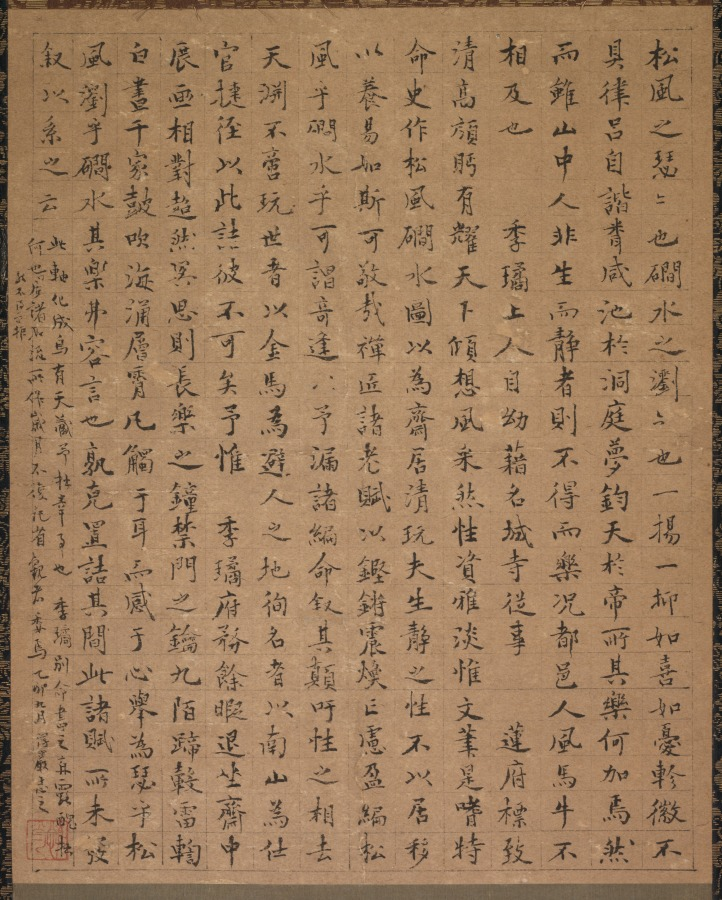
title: Landscape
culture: Japan, possibly Edo period (1615-1868)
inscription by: copy after Ishō Tokugan (Japanese, c. 1359–1437)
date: early 1600s to mid-1800s?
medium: hanging scroll; ink and slight color on paper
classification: Painting